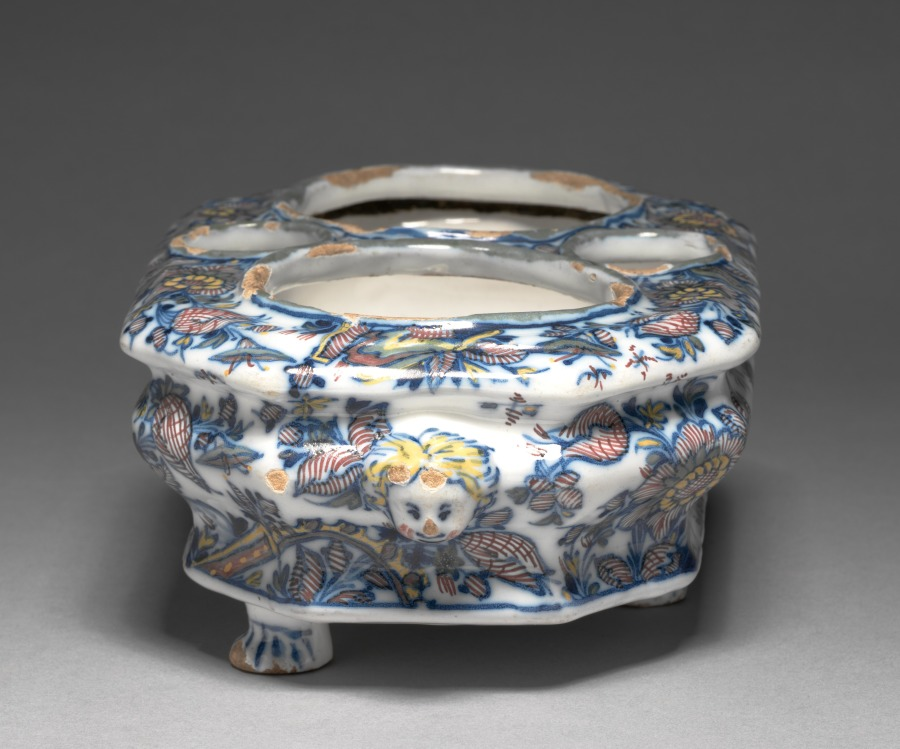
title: Cruet Stand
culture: France, Marseilles, 18th century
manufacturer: Héraud- LeRoy Factory (French)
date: c. 1740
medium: Tin- glazed earthenware (faience) wth underglaze blue decoration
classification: Ceramic